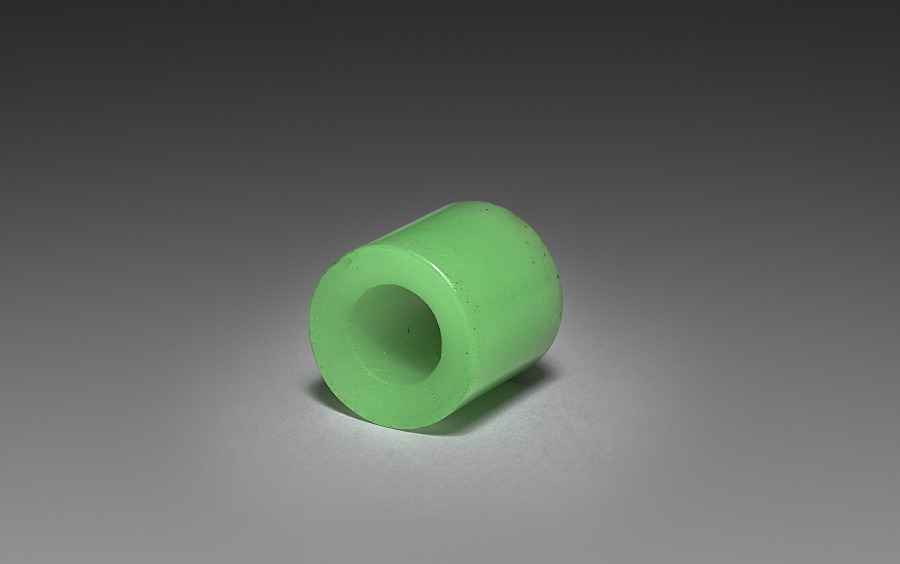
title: Earring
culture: Burma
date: 1800s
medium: glass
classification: Jewelry